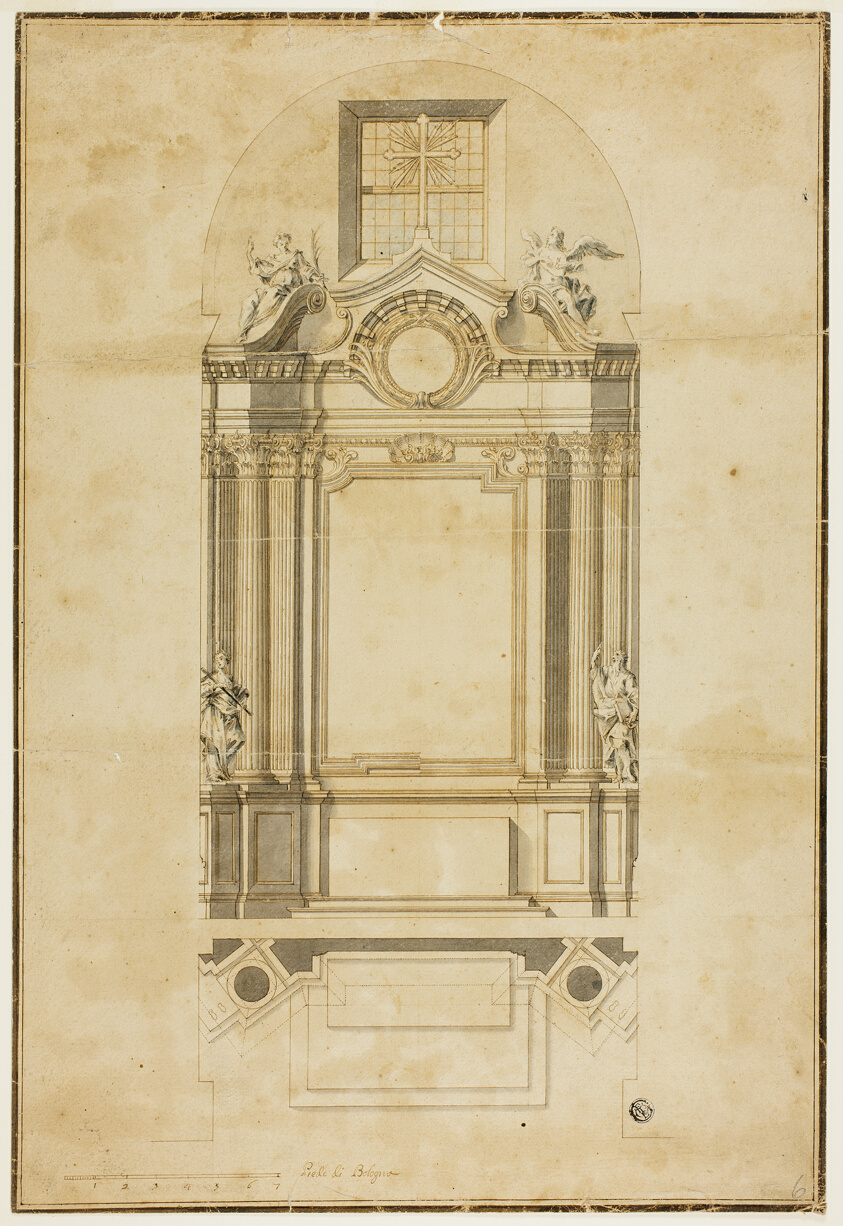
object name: Drawing and Watercolor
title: Design for an Altar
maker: Unknown Artist; Italian, possibly Bolognese, 1700-1799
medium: Pen and brown ink, with brush and blue and gray wash, over traces of graphite, on tan laid paper, laid down on ivory wove paper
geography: Italy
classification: drawings (visual works); prints and drawing